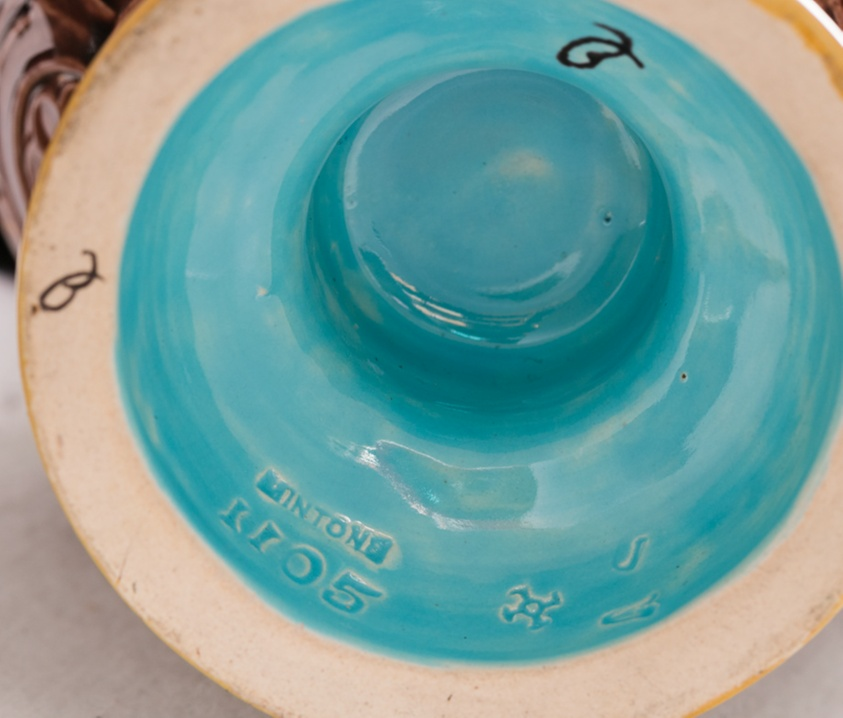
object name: Ceramics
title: Shakespeare Ewer and Basin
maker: Minton Pottery and Porcelain Factory; Stoke-on-Trent, England, founded 1793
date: Ewer: 1873, Basin: 1871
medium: Tin glazed earthenware with pewter mounts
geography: England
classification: ceramics